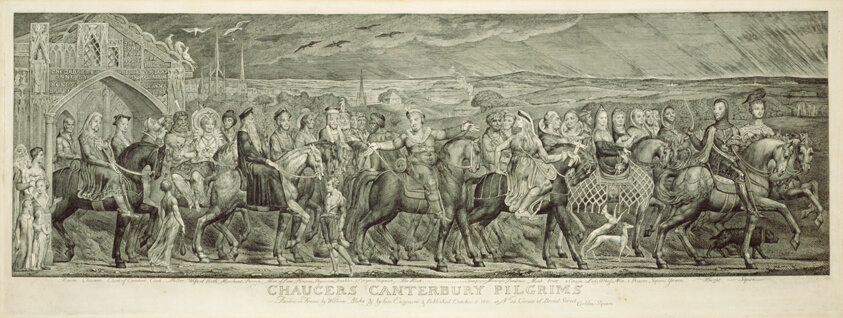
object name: Print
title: The Canterbury Pilgrims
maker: William Blake (English, 1757-1827)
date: 1810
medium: Line engraving on cream laid paper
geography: England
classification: engraving; paper; print; prints and drawing